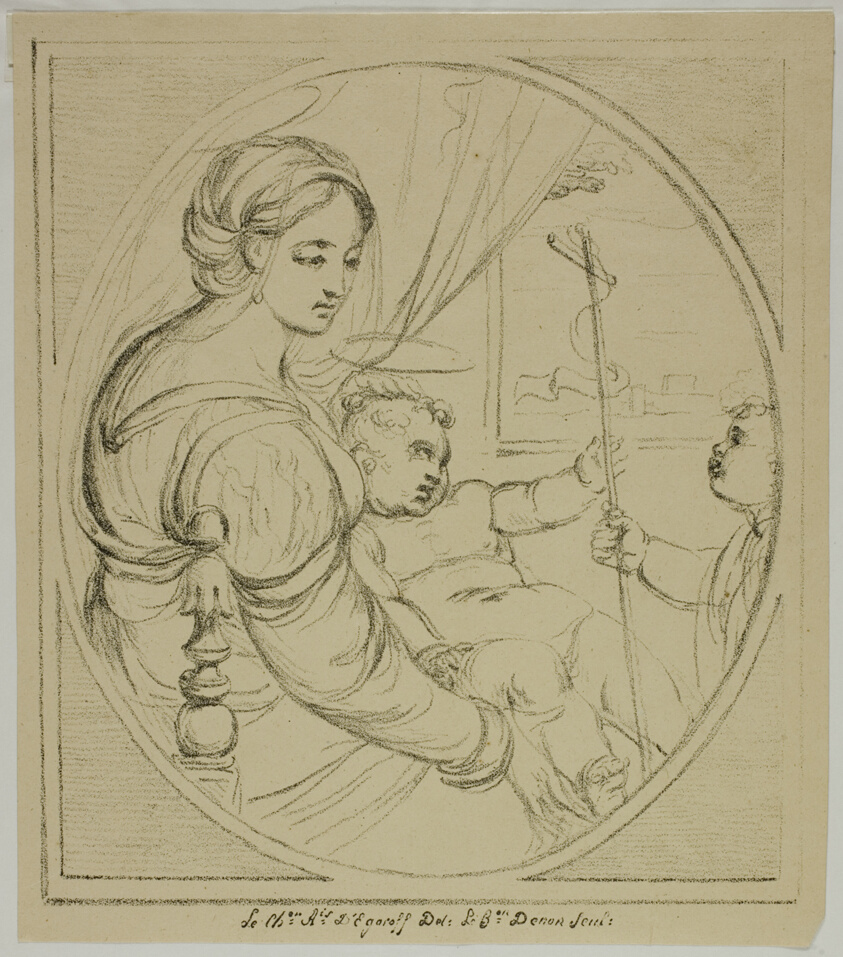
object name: Print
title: Virgin in a Chair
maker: Dominique-Vivant Denon (French, 1747-1825); after Alexis d'Egaroff (French, 18th-19th centuries)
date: 1817–20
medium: Lithograph in black on tan wove paper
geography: France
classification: lithograph; print; prints and drawing